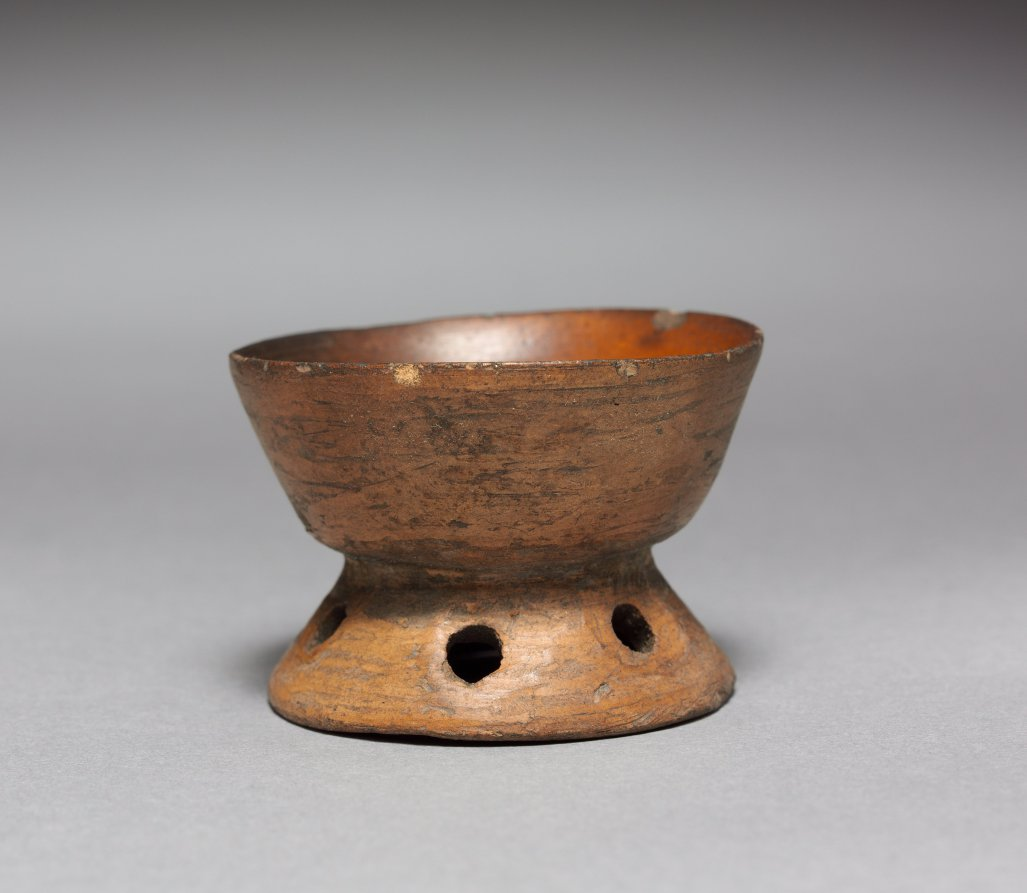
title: Dish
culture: Mexico, 16th century or earlier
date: before 1521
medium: terracotta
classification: Ceramic